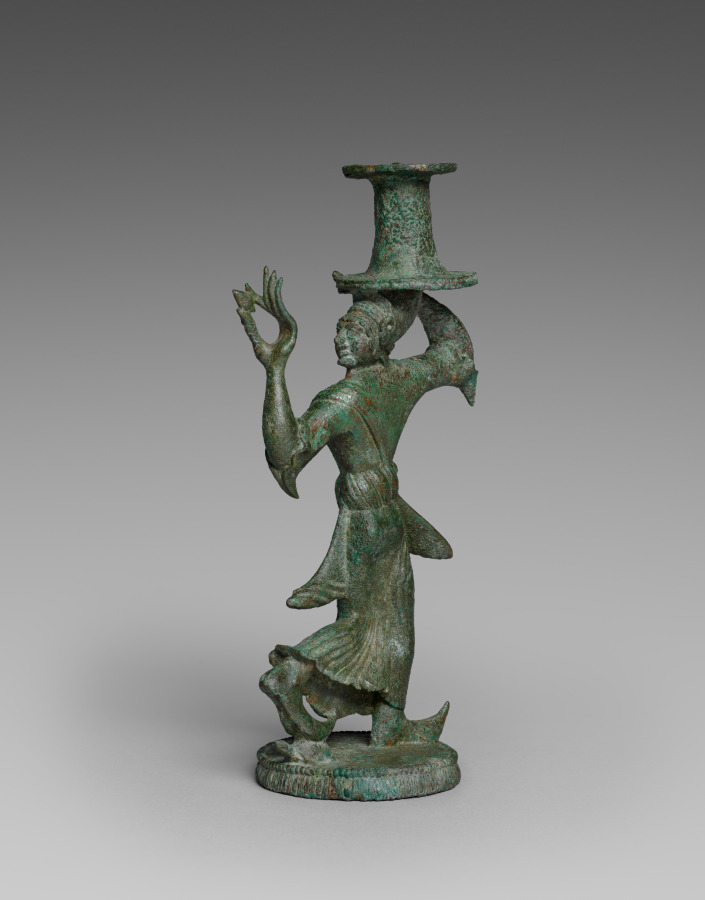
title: Candelabrum Stand of a Dancing Maenad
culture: Etruscan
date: 525–500 BCE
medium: bronze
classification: Sculpture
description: Conceived primarily in two dimensions—front and rear silhouette—this small bronze dancer probably once belonged to an elaborate candelabra or incense burner. The exaggeratedly long fingers and pointed shoes characterize the work as Etruscan, as do the stylized folds of the figure’s dress, which add visual interest but not verisimilitude. While her right hand holds above her head a cylindrical support, her left squeezes a small object, perhaps a fruit or clapper.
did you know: A small turtle beneath the figure’s back foot suggests a rustic setting.